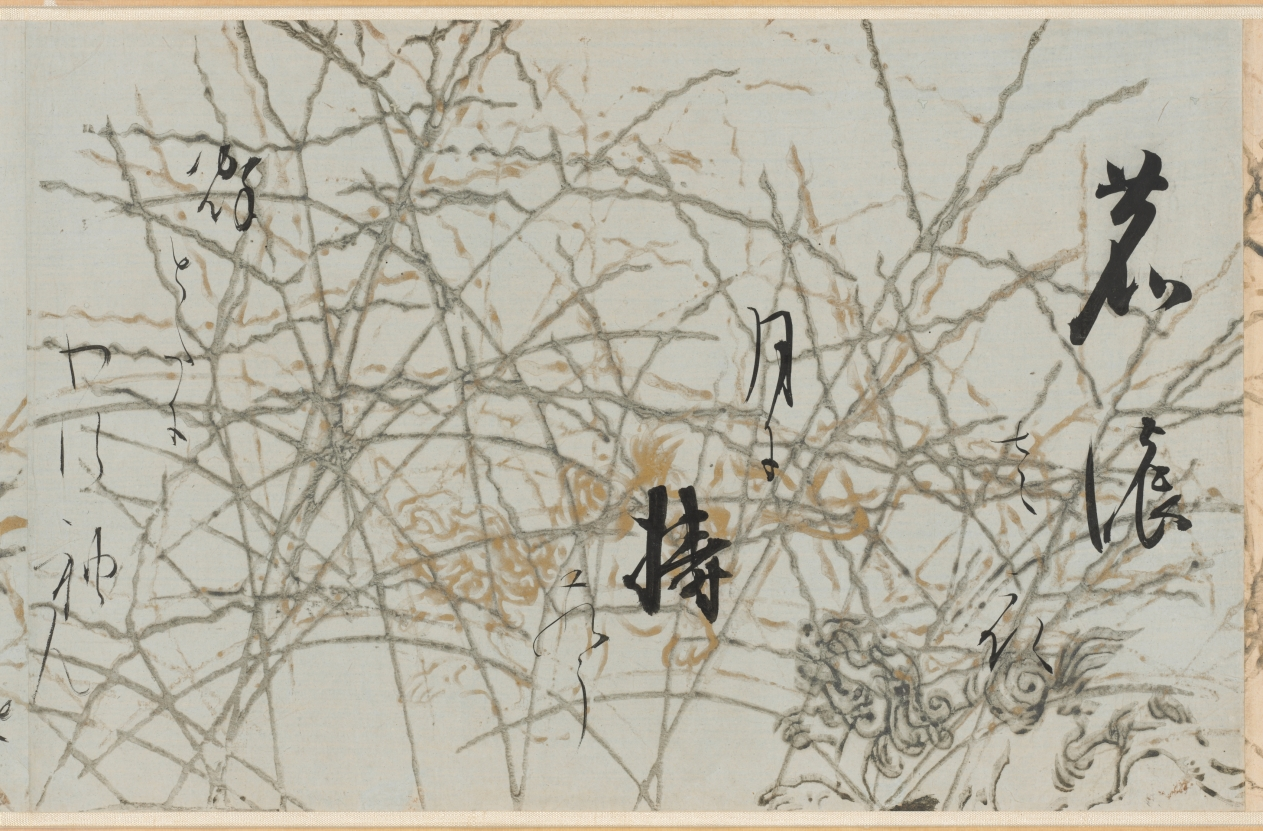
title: Selections from the New Collection of Japanese Poems from Ancient and Modern Times (Shinkokin wakashū) with Printed Designs of Chinese Lions and Crab Finger Grass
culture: Japan, Edo period (1615–1868)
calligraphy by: Hon'ami Kōetsu (Japanese, 1558–1637)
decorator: Tawaraya Sōtatsu (Japanese, c. 1570–c. 1640)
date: early 1600s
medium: handscroll; ink, gold, and silver on paper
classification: Calligraphy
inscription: Seal: 光悦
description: Hon’ami Kōetsu was a calligrapher and craftsman who frequently collaborated with the painter Tawaraya Sōtatsu, considered the first master of the Rinpa school. Kōetsu brushed seven poems from the autumn section of a poetry anthology onto dyed paper with motifs designed and printed in gold and silver by Sōtatsu.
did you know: Before becoming a master painter of screens, Tawaraya Sōtatsu painted fans.